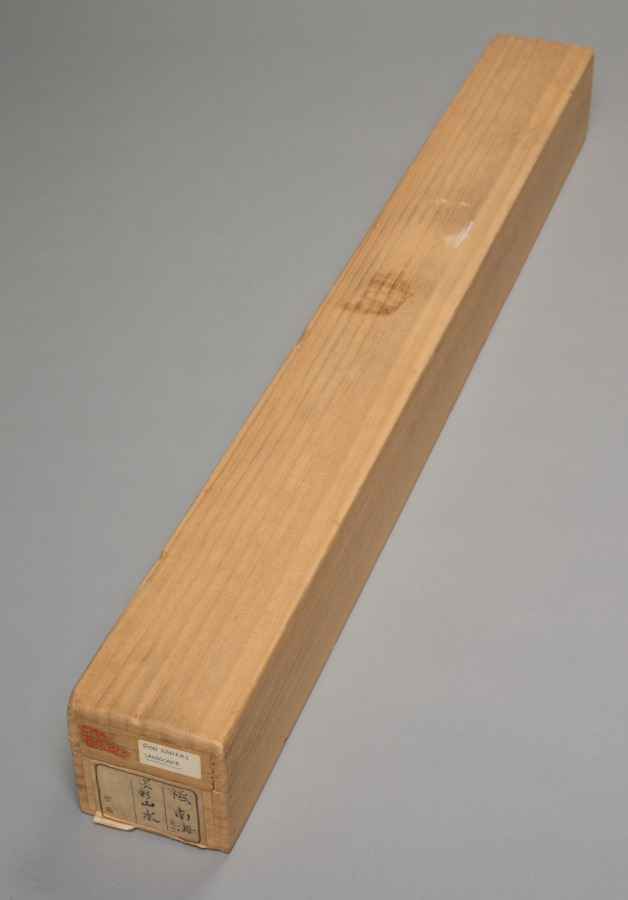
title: Landscape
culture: Japan, Edo period (1615–1868)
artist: Gion Nankai (Japanese, 1677–1751)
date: c. 1700–1751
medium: hanging scroll; ink and color on paper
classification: Painting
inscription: artist's inscription, signature and two seals at upper right corner.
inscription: The mountain pavilion is desolate, visitors are rare./ Mud patches the brushwood gate; leaves patch my clothes./ Rising not from the bamboo bed, my head like snow./ Already without intent, I abandon questions of Zen.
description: A teacher of Confucian ethics, the Chinese philosophical system focused on social harmony and familial responsibility, Gion Nankai was also a painter. Ike Taiga (池大雅) (1723–1776) was among his students. Nankai inscribed this landscape with one of 24 poems for painting subjects composed by the scholar and painter Tang Yin (唐寅) (Chinese, 1470–1524). It reads as follows: The mountain pavilion is desolate, visitors are rare. Mud patches the brushwood gate; leaves patch my clothes. Rising not from the bamboo bed, my head like snow. Already without intent, I abandon questions of Zen.